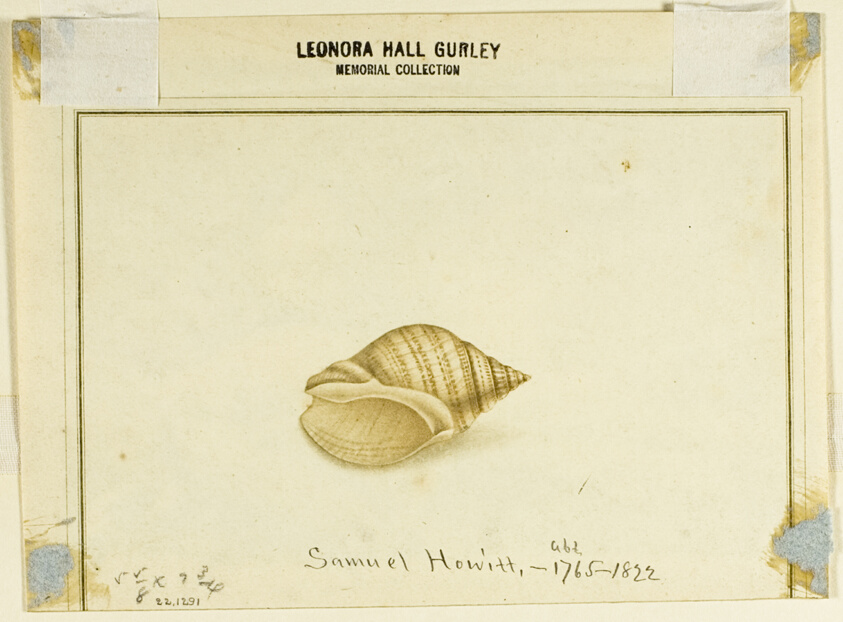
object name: Drawing and Watercolor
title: Siberian Exiles Shooting Wild Reindeer (recto); Shell (verso)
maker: Recto attributed to Samuel Howett (English, c. 1765-1822); Verso by Unkown Artist (British, 19th century)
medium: Pen and black ink, with brush and gray and brown wash, over graphite (recto), and print (verso), on ivory wove paper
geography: England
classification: ink or chalk wash; drawings (visual works); prints and drawing